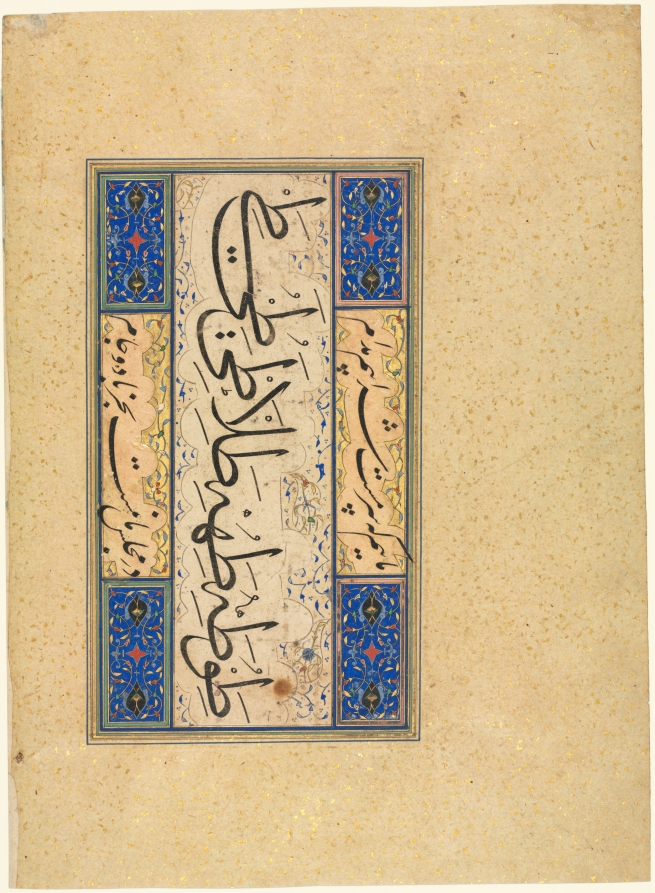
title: Persian Verse (khamriyya) (verso)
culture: Afghanistan, Herat, Safavid period (1501–1722)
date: c. 1509–59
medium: ink, gold, and opaque watercolor on paper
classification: Manuscript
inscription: [Persian khamriyya]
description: This page contains two quatrains—poems made up of four lines. The diagonally written text in the center of the page is a poem addressed to a ruler, expressing hope for his success and the downfall of his enemies. The second poem is split between the horizontal panels at the top and bottom of the page. This quatrain praises the beauty of the writer’s beloved, saying that “her moonlike face can steal away a hundred besotted hearts.” At the right are calligraphic exercises displaying letters of the alphabet and the virtuoso skill of the calligrapher Sultan Muhammad Khandan, who signed the page in the triangle at the lower left of the inner text block.